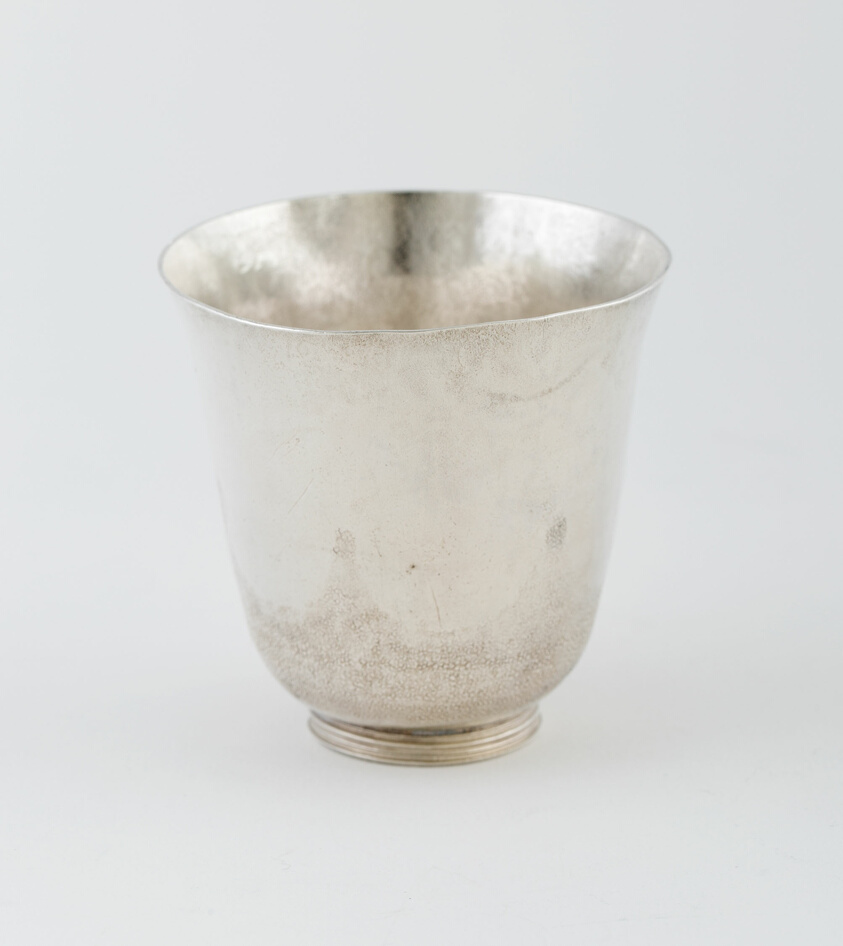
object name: Metalwork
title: Beaker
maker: England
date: 1690/91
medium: Silver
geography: England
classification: drinking vessel; silver; metalwork; european decorative arts